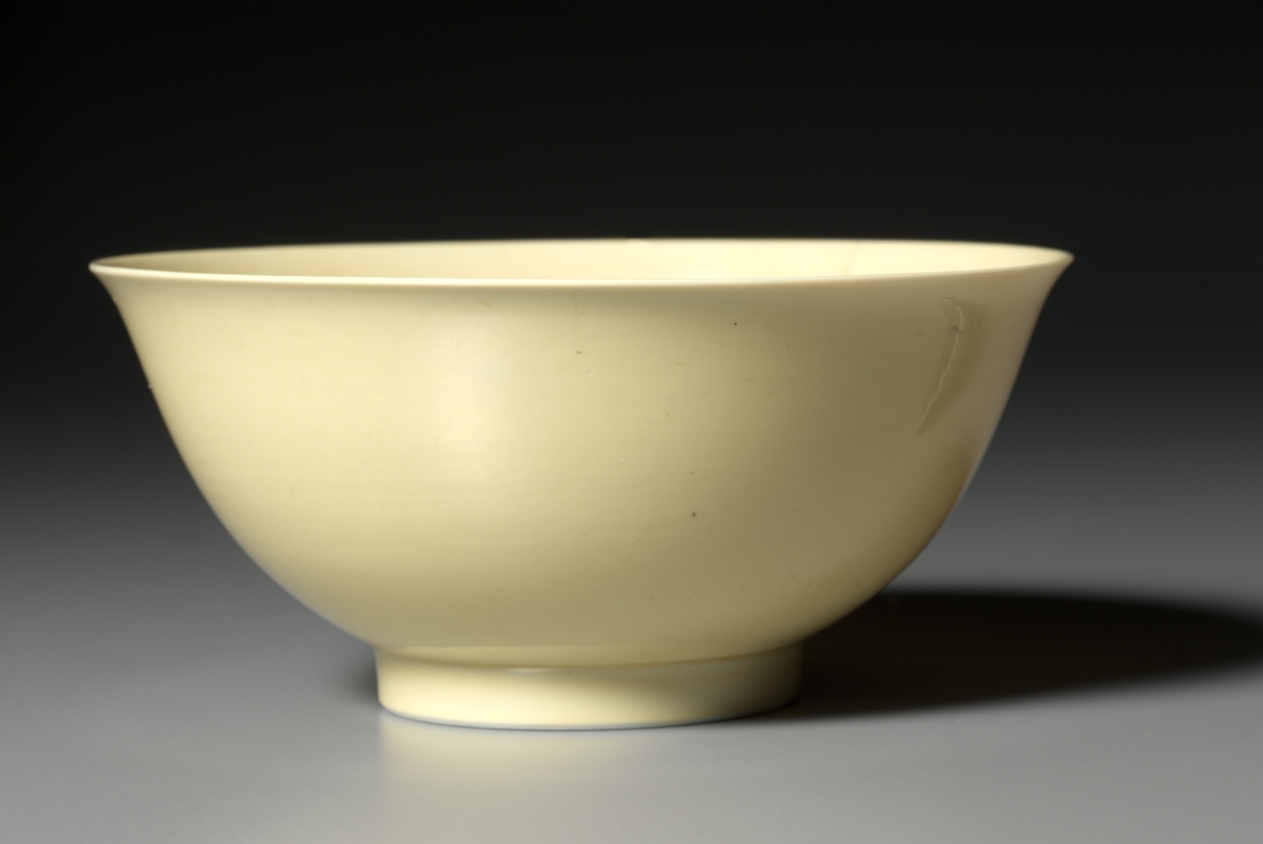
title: Bowl with Yellow Glaze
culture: China, Qing dynasty (1644-1911), Yongzheng mark and reign (1723-35)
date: 1723–1735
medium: glazed porcelain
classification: Ceramic